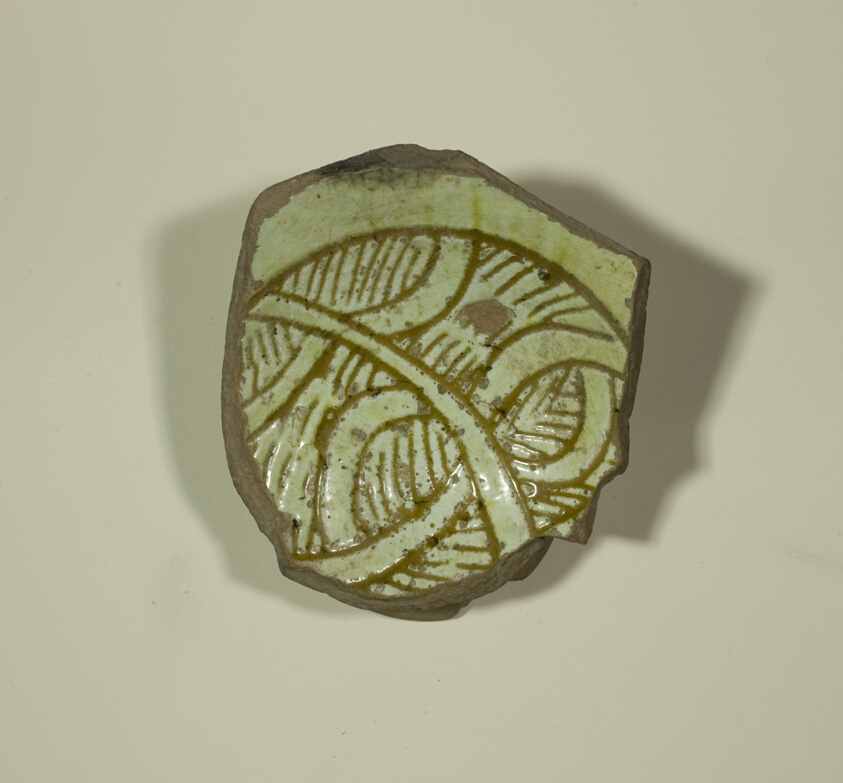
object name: Decorative Arts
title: Fragment from the Base of a Bowl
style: byzantine, european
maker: Byzantine; Constantinople or vicinity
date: 13th-14th century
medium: Glazed terracotta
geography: Thessaloníki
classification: fragment; ceramics; vessel; bowl; asian art; decorative arts